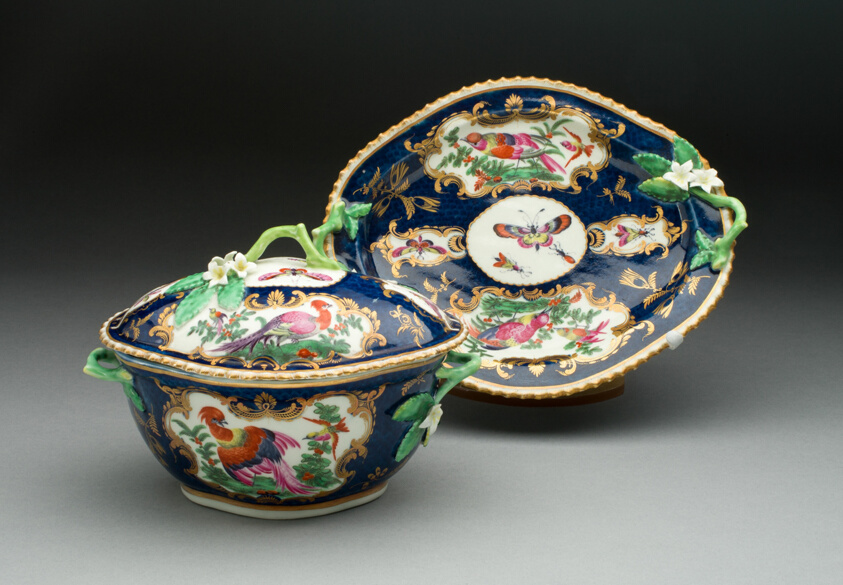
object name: Ceramics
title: Tureen and Stand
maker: Worcester Porcelain Factory (Warmstry House Period, 1751–1783); Worcester, England, founded 1751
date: c. 1770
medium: Soft-paste porcelain, underglaze blue, polychrome enamels and gilding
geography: Worcester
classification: ceramics; tableware; porcelain; european decorative arts